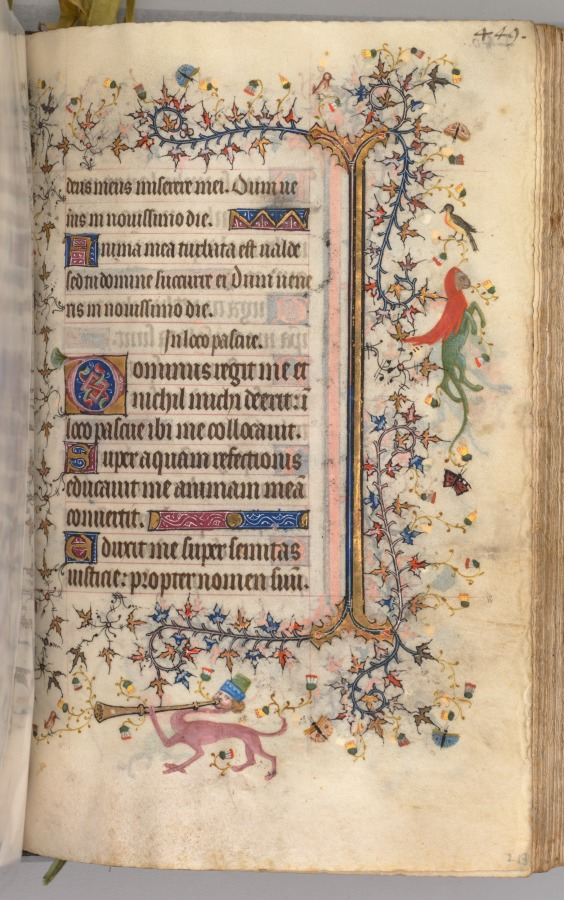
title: Hours of Charles the Noble, King of Navarre (1361-1425): fol. 219r, Text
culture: France, Paris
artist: Master of the Brussels Initials and Associates (French)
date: c. 1405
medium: ink, tempera, and gold on vellum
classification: Bound Volume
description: This precious volume was obviously highly prized by its owner, the French-born King of Navarre, who had his coat of arms painted on no less than twenty folios. Rather than directly commissioning this manuscript from a specific workshop, it seems that Charles the Noble acquired his book of hours -- perhaps ready-made for the luxury market -- while on a trip to Paris in 1404-05. A collaborative effort, six painting styles are evidenced within the pages of this codex, those of two Italians, two Frenchmen, and two Netherlanders. The painter who was responsible for the planning and decoration of the book, and who produced seventeen of the large miniatures, was a Bolognese artist known as the Master of the Brussels Initials. His principal assistant, responsible for most of the borders, was a Florentine who signed his name "Zecho" da Firenze on folio 208 verso.